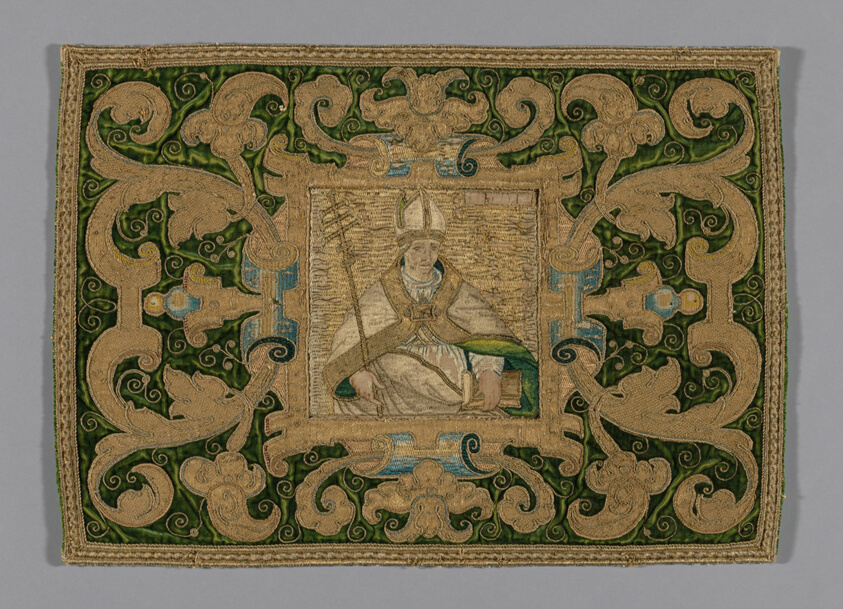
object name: Textile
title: Fragment (From a Chasuble)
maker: Spain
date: 17th century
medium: Green velvet with figures of two Saints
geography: Spain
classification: textile; costume; liturgical; weaving